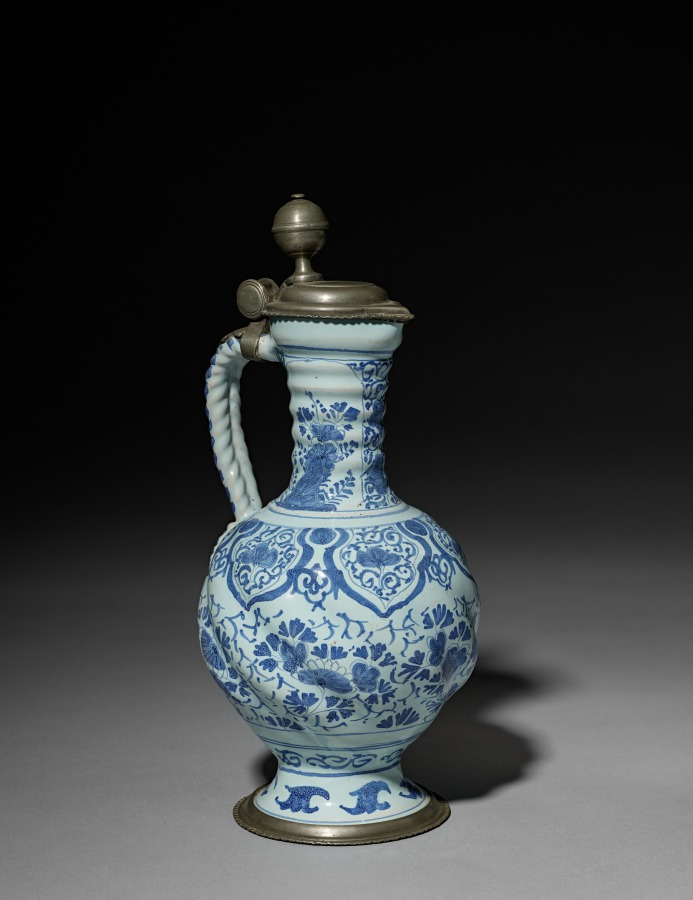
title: Ewer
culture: Germany, Frankfurt(?), early 18th century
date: c. 1700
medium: earthenware decorated in underglaze blue with pewter mounts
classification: Ceramic